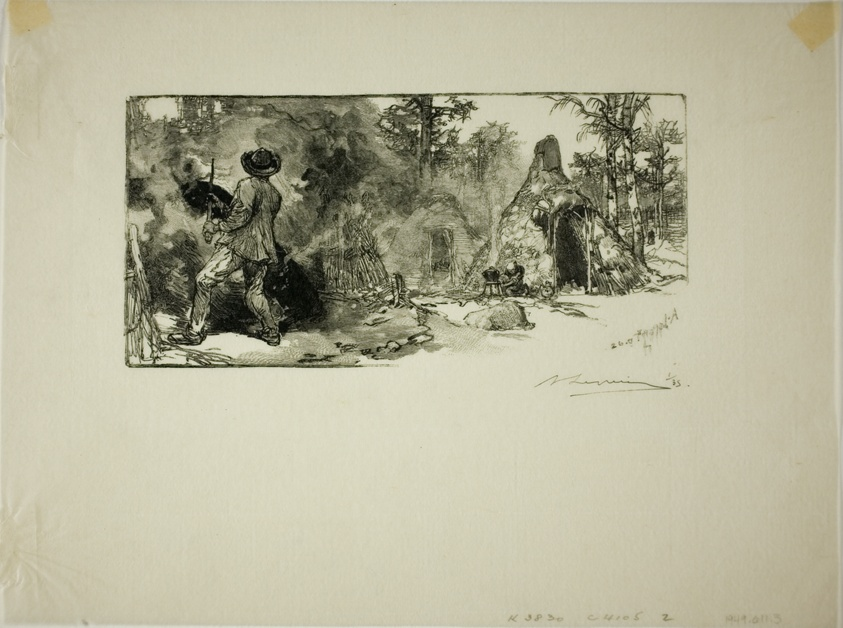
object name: Print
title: The Charcoal Burners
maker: Louis Auguste Lepère (French, 1849-1918); published by A. Desmoulins (French, active c. 1908-1910)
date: published 1908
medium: Wood engraving in black on cream laid Japanese paper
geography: France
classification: wood engraving; print; prints and drawing